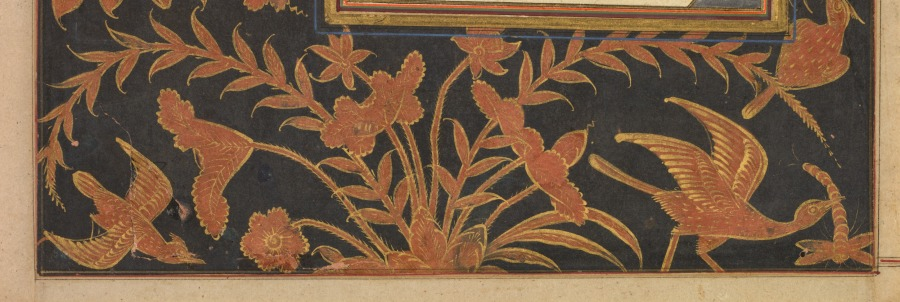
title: Folio B: Folio from the "Five Treasures" (Panj Ganj) of Jami (recto)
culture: Northern India, Mughal, early 17th century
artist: Mushfiq (Indian, active early 1600s)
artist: and others (Indian)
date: 1520–1607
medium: Gum tempera, ink, and gold on paper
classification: Painting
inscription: The miniature signed at upper left: ' amal - i Mushfiq sana 1015 (the work of the Mushfiq year 1015) Text on verso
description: This page contains two different texts, one written diagonally in the border and the other in the two central columns. The section of poetry in the border describes an episode from Joseph’s childhood in which his older brothers suggest to Jacob, their father, that they take Joseph into the countryside so that the boy can learn the area, although they actually plan to kill him. The poem in the central columns advises the reader to smile often, as a smile is sweeter and more pleasing than sugar.